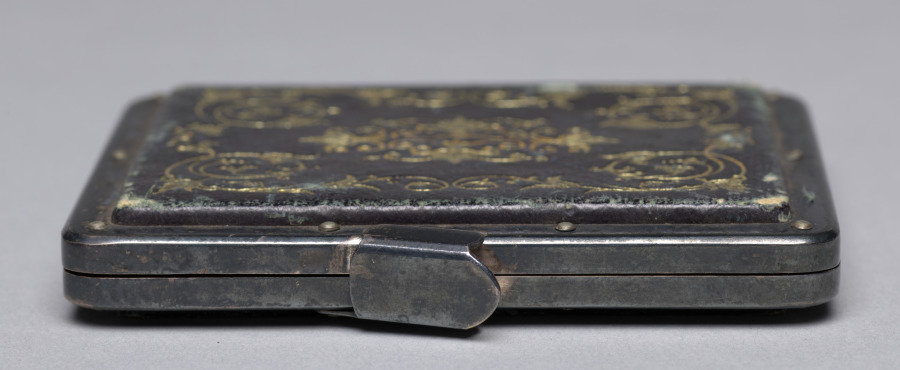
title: Construction of the John Stewart Store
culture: America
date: c. 1856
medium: daguerreotype, sixth plate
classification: Photograph